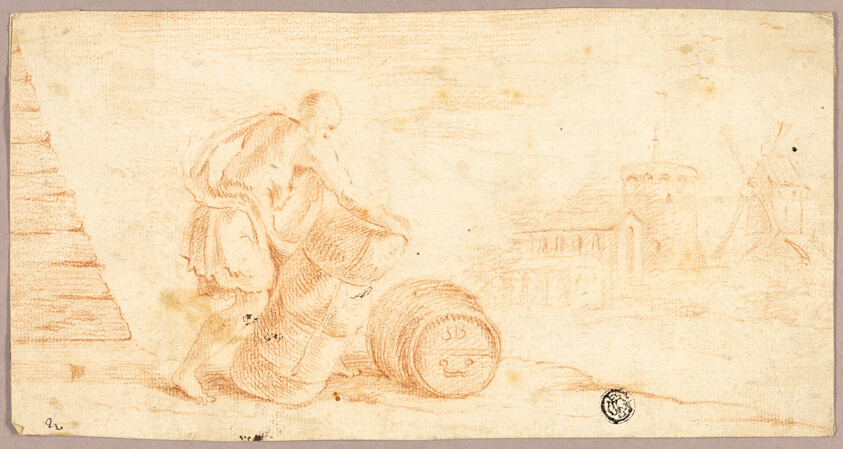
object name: Drawing and Watercolor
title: Man Moving Bale, Cask, with Windmill in Distance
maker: Unknown Artist; Dutch, n.d.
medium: Red chalk on ivory laid paper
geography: Holland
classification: chalk; drawings (visual works); prints and drawing